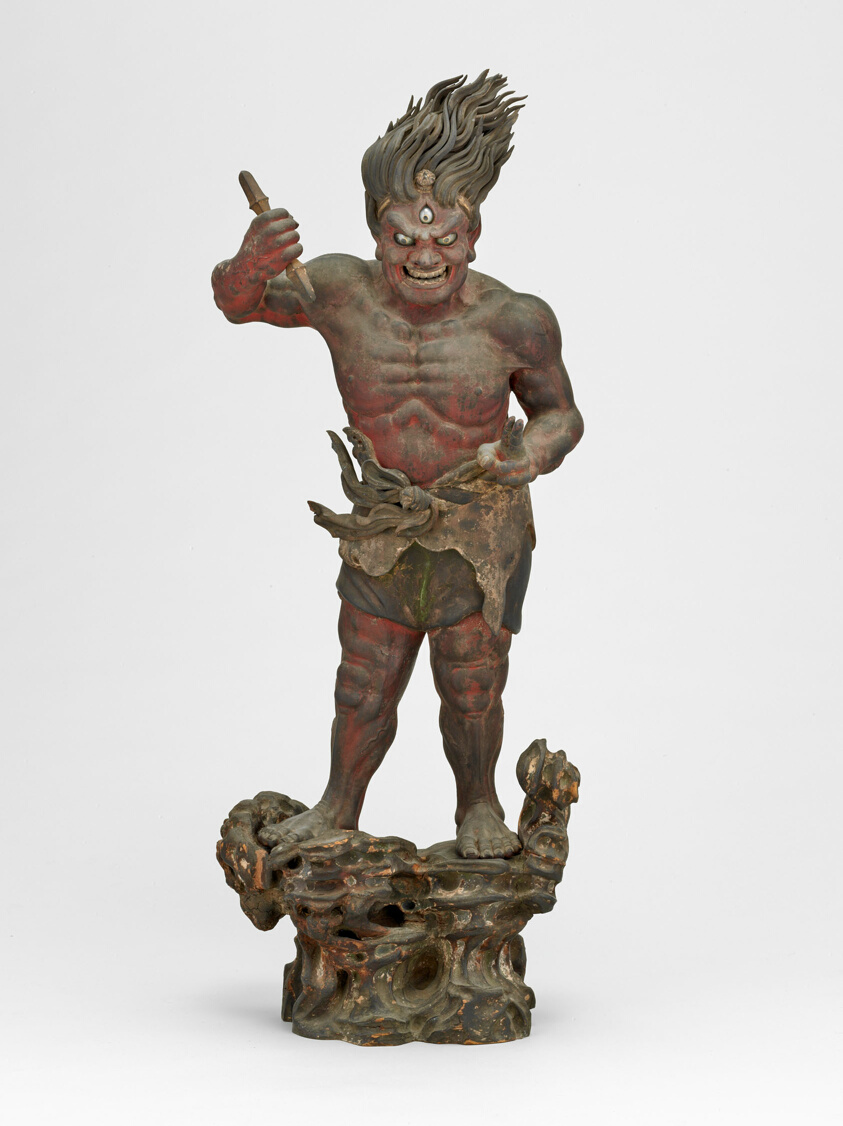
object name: Sculpture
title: Shukongojin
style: Japanese (culture or style)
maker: Japan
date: Kamakura Period, 12th/14th century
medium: Wood with traces of polychromy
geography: Japan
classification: wood; sculpture; asian art